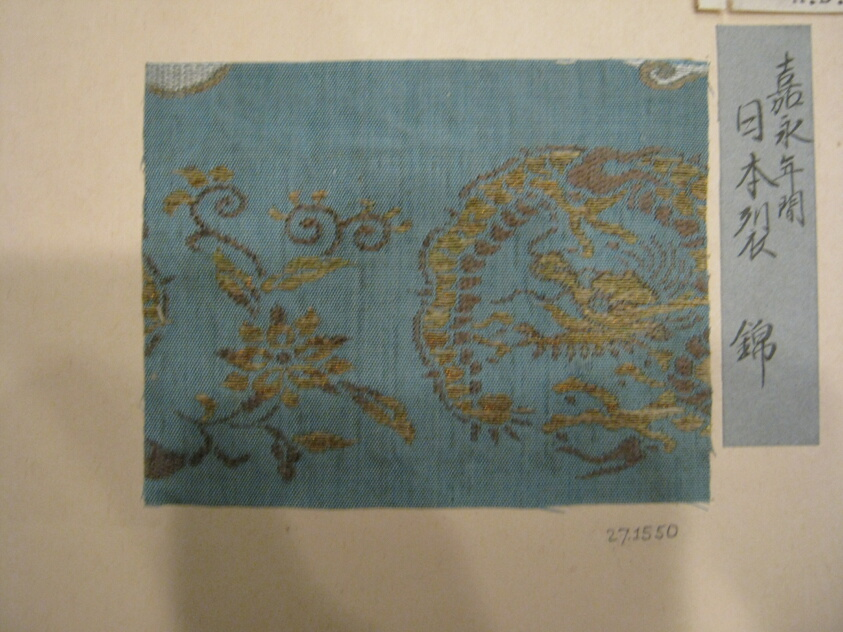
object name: Textile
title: Fragment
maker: Japan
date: 18th century, late Edo period (1789–1868)/ Meiji period (1868–1912)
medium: Brocaded plain simple cloth, silk & gilt paper wound on white cotton core.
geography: Japan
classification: textile; weaving